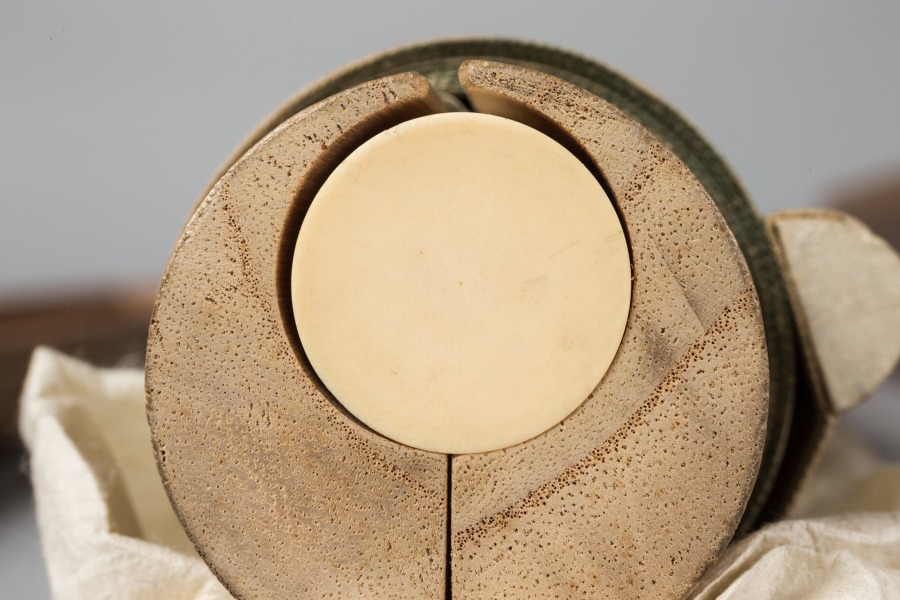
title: Scene from a Noh Play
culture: Japan, Edo period (1615–1868)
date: early 1700s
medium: hanging scroll; ink, color, and gold on paper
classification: Painting